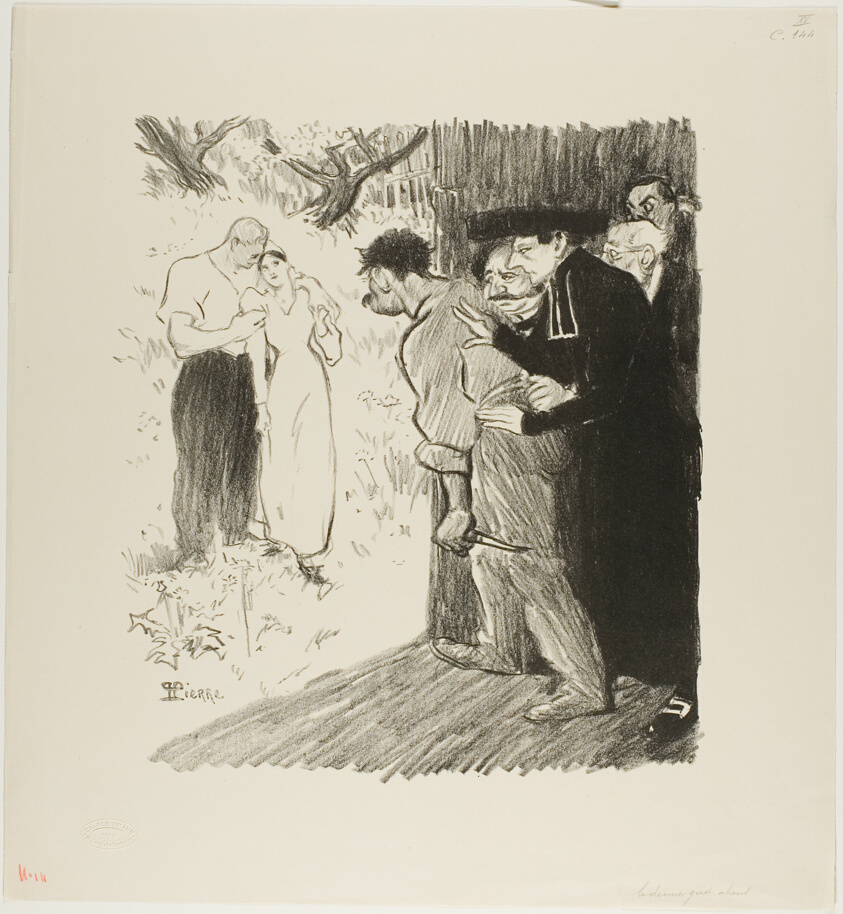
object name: Print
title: The Last Ambush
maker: Théophile-Alexandre Steinlen; French, born Switzerland, 1859-1923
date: March 1894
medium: Lithograph in black on cream wove paper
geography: France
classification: lithograph; print; prints and drawing